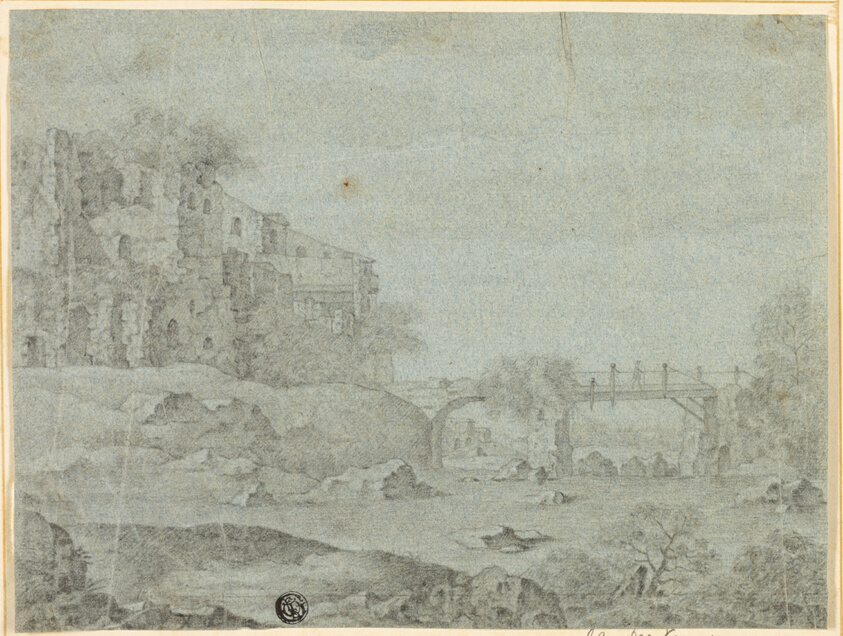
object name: Drawing and Watercolor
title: Ruins Overlooking River with Bridge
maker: Attributed to or possibly after Adriaen Pietersz. van de Venne; Dutch, 1589-1662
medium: Black chalk, on blue laid paper, tipped onto buff wove paper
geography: Holland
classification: graphite; drawings (visual works); prints and drawing